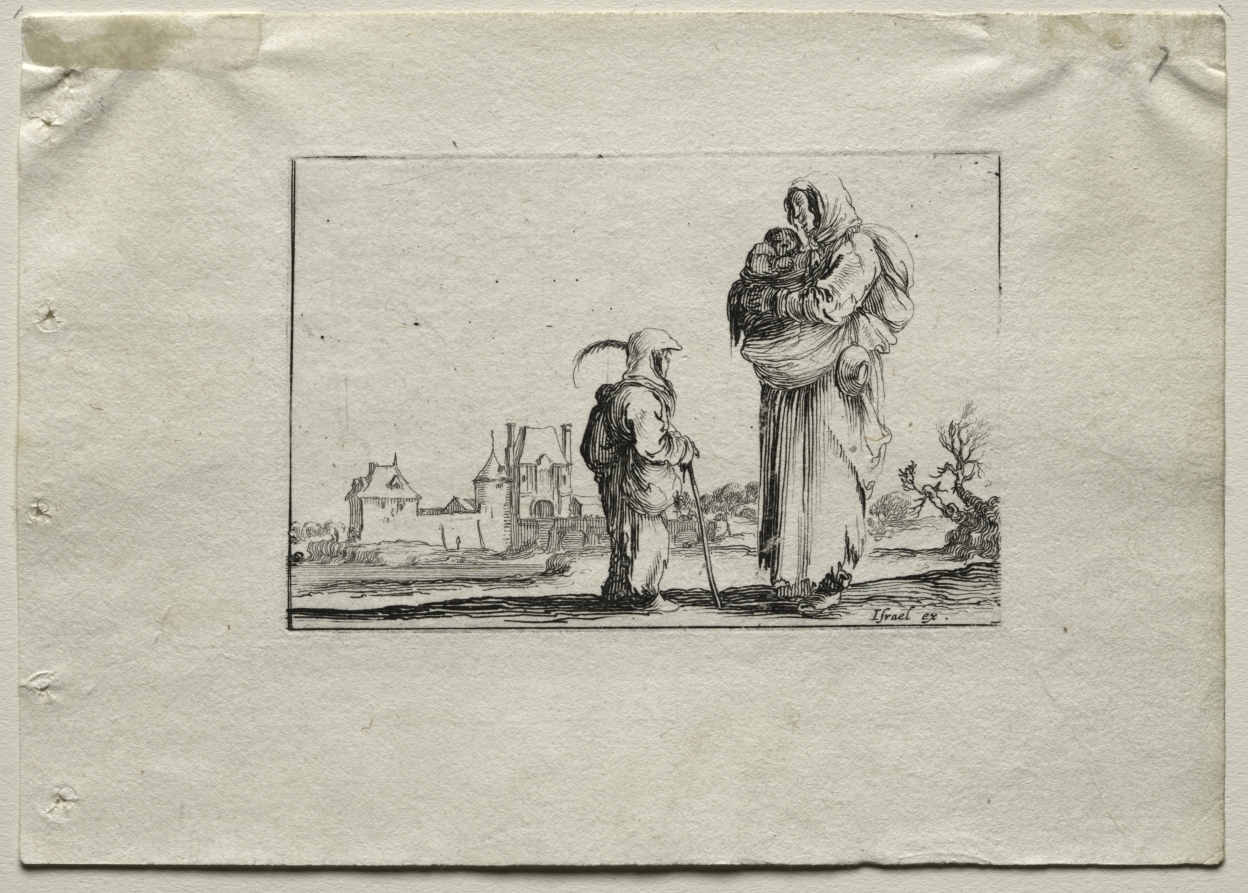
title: Caprices: Beggar Woman with a Baby and a Little Girl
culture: Italy, 17th century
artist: Stefano Della Bella (Italian, 1610–1664)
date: c. 1642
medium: etching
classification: Print